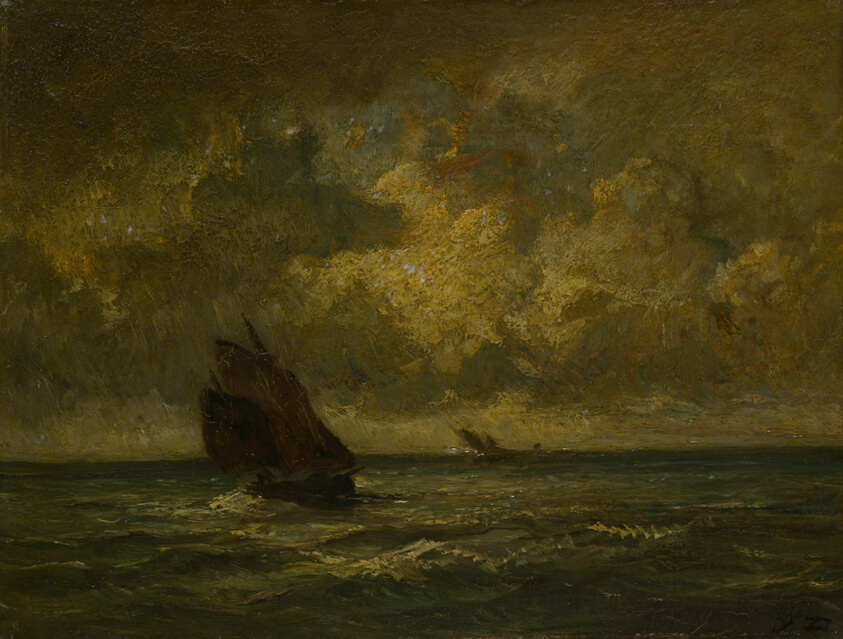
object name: Painting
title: Two Boats in a Storm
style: nineteenth century, 19th century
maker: Jules Dupré (French, 1811–1889)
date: 1870/75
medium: Oil on canvas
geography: France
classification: painting; oil paintings (visual works); france; french; oil on canvas; paint; european painting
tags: storms, boats, clouds, ocean, sailing, sky, travel, waves, weather/seasons